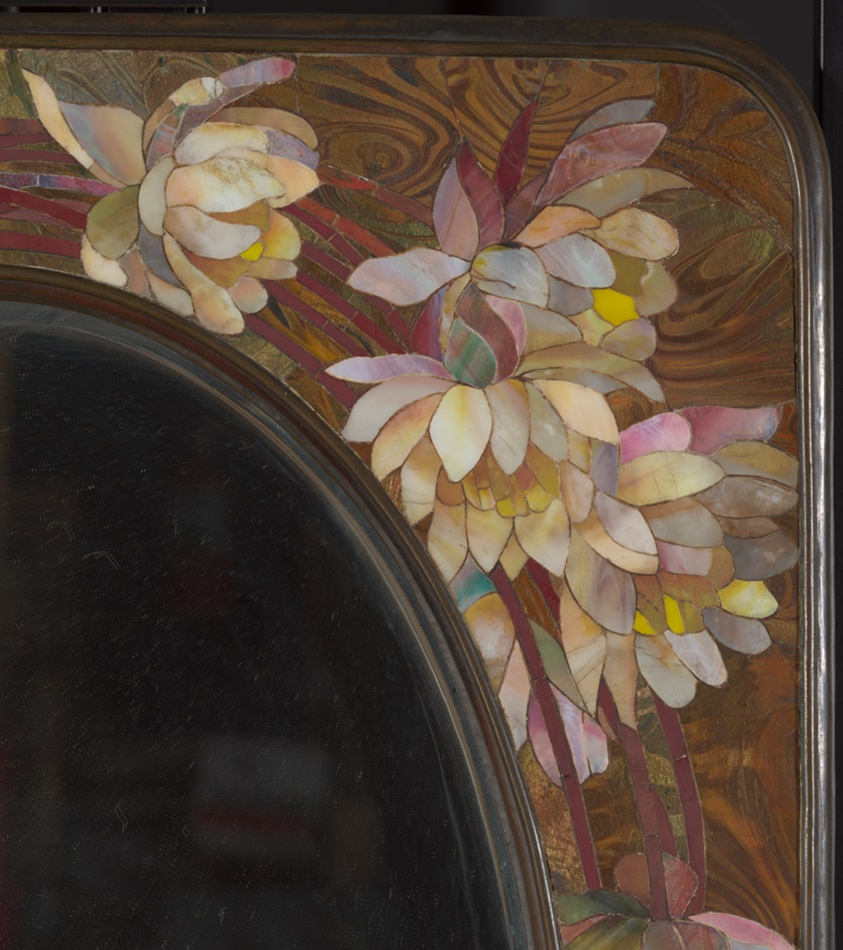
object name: Furnishings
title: Mirror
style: Arts and Crafts Movement, 20th Century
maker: Possibly designed by Clara Pierce Wolcott Driscoll (American, 1861–1944); and/or Joseph Briggs (American, born England, 1873–1937); Tiffany Glass and Decorating Company (American, 1894–1902); or Tiffany Studios (American, 1902–32); Corona, New York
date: c. 1901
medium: Favrile glass, mirrored glass, and bronze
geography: Corona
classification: flat mirrors; american decorative arts; decorative arts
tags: lotus, reflections, swirl motifs